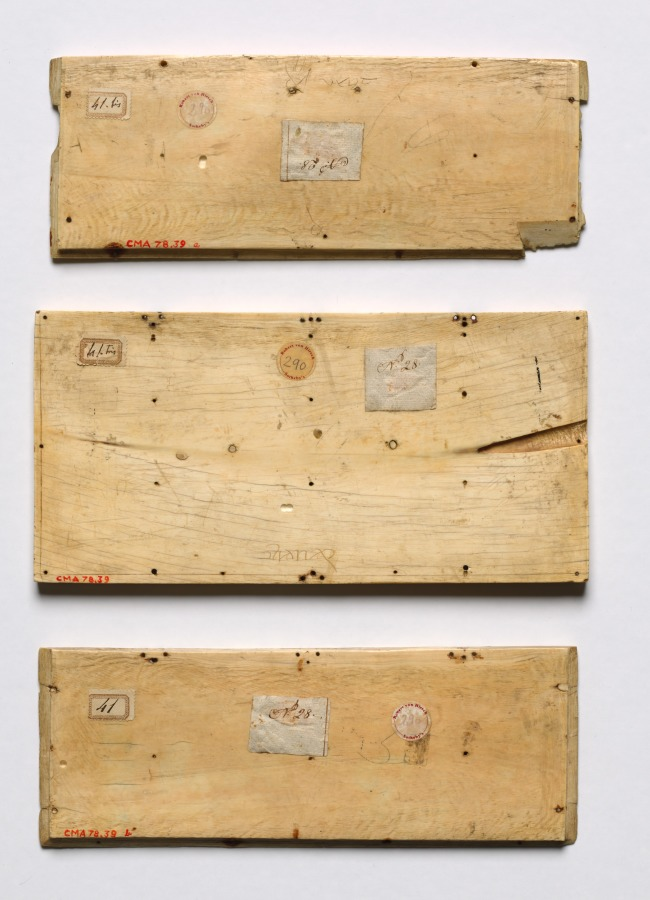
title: Set of Three Panels from a Casket with Scenes from Courtly Romances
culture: France, Lorraine?, Gothic period, 14th century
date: c. 1330–50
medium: ivory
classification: Ivory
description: Among the most lavish and deluxe products of French ivory workshops of the 1300s were large caskets carved with elaborate scenes drawn from courtly romances. The panels shown here come from such a casket. The largest panel (center) once formed the lid and depicts a tournament, the most splendid and romantic of knightly activities. Just to the right is a favorite allegory of chivalric love: knights assaulting the castle of love. The two side panels depict other scenes such as the fountain of youth, Sir Gawain and the Lion, and Lancelot crossing the sword bridge. These images suggesting chivalry, fertility, virginity, youth, and an idealized courtly love likely derive from manuscripts including the Roman de la Rose and the poems of Chrétien de Troyes. Such texts were often found within the libraries of the aristocracy, so the casket’s symbolic images would have been readily understood. Such caskets may have originally been gifts between a man and a woman. The expense of the material, ivory, suggests they were produced for an elite, aristocratic clientele.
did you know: In the center panel two knights in mail surcoats and helms joust here with blunted lances "for courtesy," a version of the joust known as the Joust of Peace.